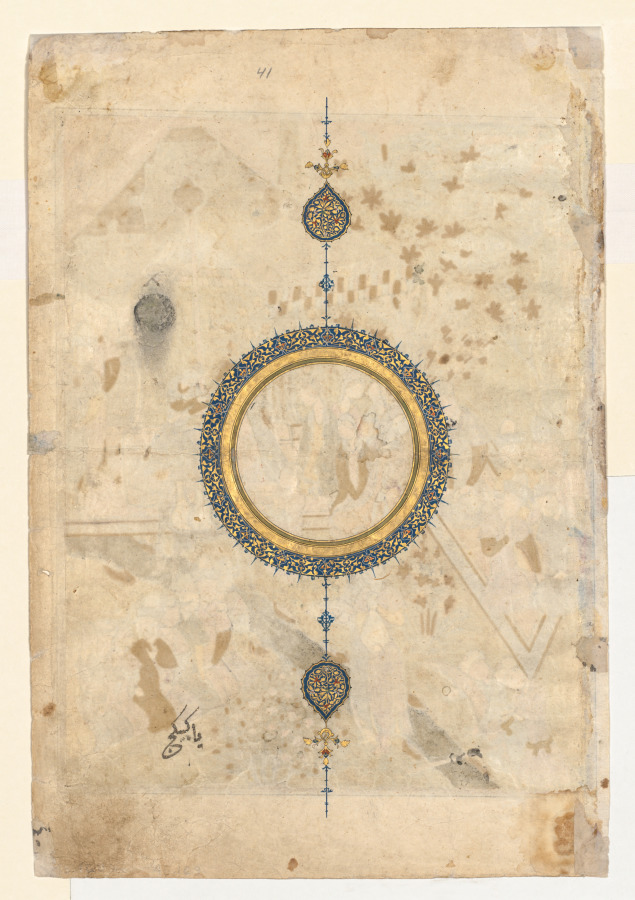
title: Shamsa (recto) from right folio from a double-page frontispiece of a Shahnama (Book of Kings) of Firdausi (940–1019 or 1025)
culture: Iran, Shiraz, Timurid period (1370-1501)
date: c. 1444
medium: opaque watercolor and gold on paper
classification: Manuscript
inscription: Yā kabīkaj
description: At the center of the recto side of this folio is a shamsa, or sunburst, an exquisite symmetrical pattern of floral and geometric shapes painted in precious pigments and gold to reference divine light. The shamsa might have been intended to contain a name or portrait identifying the manuscript’s original owner, but in this case it is empty.